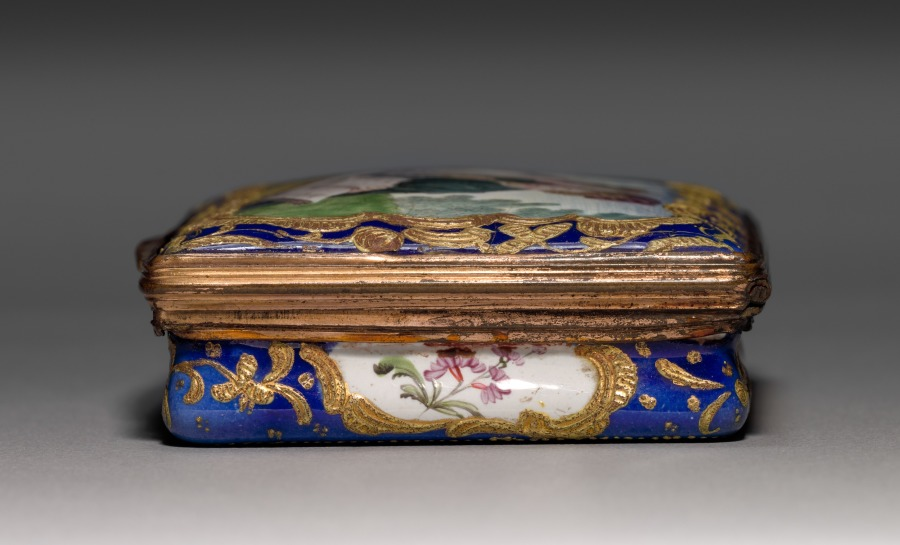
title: Snuff Box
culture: England, South Staffordshire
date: c. 1770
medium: enamel on copper, gilt metal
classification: Miscellaneous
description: Luxurious personal objects, like this snuff box, were an essential part of a privileged wardrobe during the 1700s and early 1800s, emphasizing their owner’s refinement and wealth. Their glittering surfaces, however, disguised a system based on the labor and suffering of enslaved or indentured people, whether in gold or stone mines, tobacco farms, or shops where these goods were made. Like cotton, sugar, and tea, snuff came from British colonies in America, India, and the Caribbean, where enslaved people were exploited to grow these crops under extremely harsh conditions. Slavery was not abolished in much of the British Empire until 1833. Britain and other European nations continued to pursue colonialism with a sense of superiority that found its way into all aspects of life, including decorative objects glorifying their conquests.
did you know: This small, elaborate box held snuff, a form of powdered tobacco that was inhaled in tiny amounts.